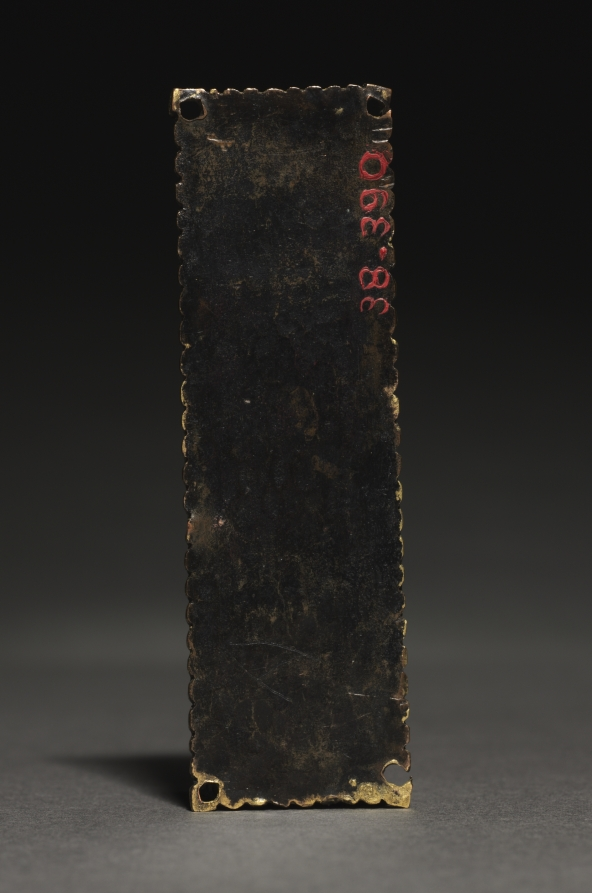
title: Plaque, probably from a Reliquary Shrine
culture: Mosan, Valley of the Meuse, Gothic period, mid-13th century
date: c. 1200–1250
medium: gilded copper; champlevé enamel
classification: Enamel